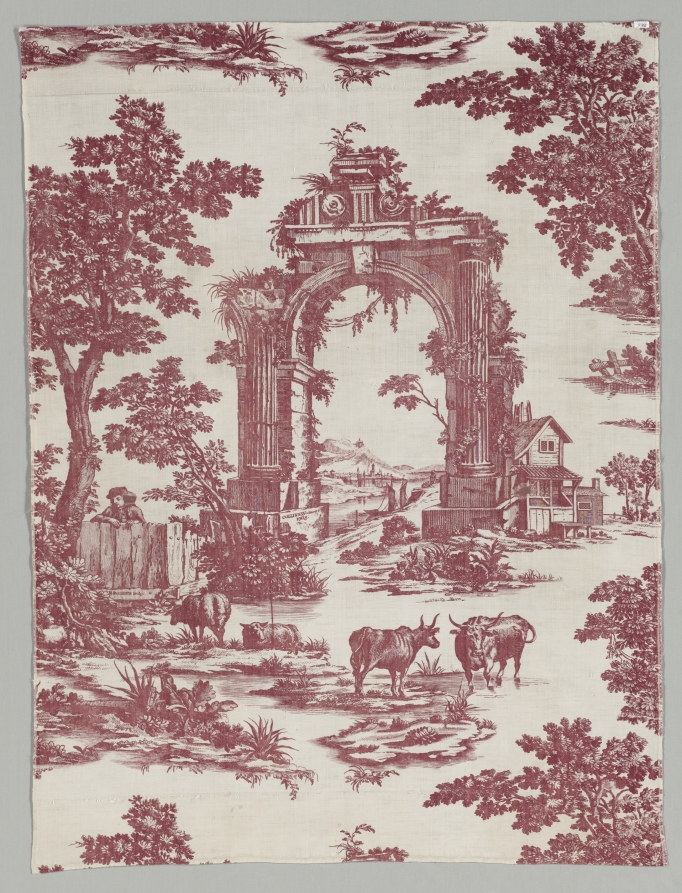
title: Copperplate Printed Cotton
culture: England, 18th century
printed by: firm of John Collins (British)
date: 1765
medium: copperplate printed cotton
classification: Textile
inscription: inscribed on the arch: "COLLINS Woolmers 1765" and "H. ROBERT sculp."